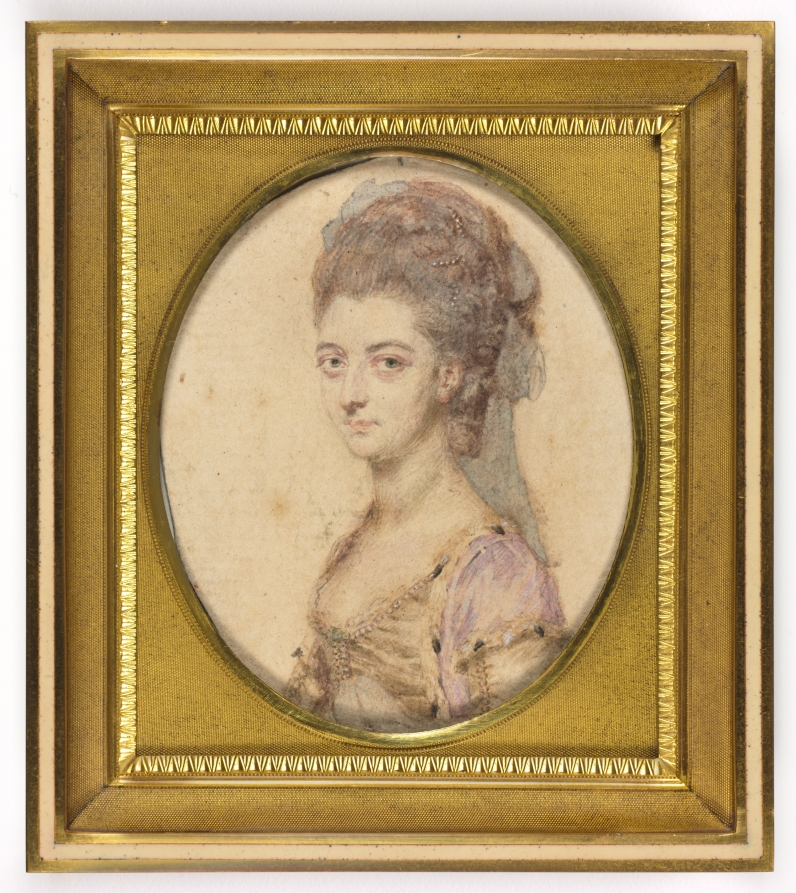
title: Portrait of Charlotte Bertie, née Warren, 4th Countess of Abingdon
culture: England, 18th century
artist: John I Smart (British, 1741–1811)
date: 1778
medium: graphite and wash on laid paper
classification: Portrait Miniature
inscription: inscribed on verso of paper to top in brown ink: [L]ady Abingto[n] 1778; inscribed at bottom of verso in graphite: J Smart / Lady Abington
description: Although it is impossible to say if it was always part of the artist’s process to execute a preparatory sketch prior to painting each miniature, we do know that John Smart retained many hundreds of these sketches. A group of preparatory sketches—of which this portrait is one—descended through the Smirke family after Smart’s daughter Sarah gave a sketchbook containing preparatory portrait studies to her friend Mary Smirke, sister of the celebrated Victorian architect Sydney Smirke. This book was probably broken up around 1877 when it was divided between Sydney’s daughters Mary Jemmett and Mrs. Lange, whose portions were both sold at auction in 1928. G. C. Williamson was the first to suggest that Smart’s sketches were well known and that they were preparatory studies for the painted miniatures. Williamson listed the names of sitters from the sketches known to him at the time, and they included Lady Abingdon. Here, Lady Abingdon’s head and shoulders face right. Her brown hair is dressed high on her head, and a strand of pearls is woven through the left side of her coiffure. A veil descends from the top of her head, past her shoulders. She has gray eyes. Compared to his contemporaries George Engleheart (1752–1829) and Andrew Plimer (1763–1837), whose female sitters were often painted in similar simple white gowns, Smart often lavished more attention on the costumes in his portraits of women, whose dresses incorporated colored silks, printed fabrics, and luxury trimmings like lace and fur. Thus, Lady Abingdon wears a low-necked, pink dress trimmed with ermine and strands of pearls. The background is unpainted. The removal of the paper backing revealed an inscription in brown ink, written in Smart’s hand, dating the work and verifying the identity of the sitter as Lady Abingdon. Lady Abingdon (d. 1799) was the daughter of Admiral Sir Peter Warren, K.B., M.P. She married Willoughby Bertie, 4th Earl of Abingdon, in 1768. They had six children, two of whom died very young. It is for Lady Abingdon that Abingdon Square in New York City is named, courtesy of her father, who had purchased 300 acres of land in Greenwich Village in 1744. Her husband’s famous protestations against the British government’s treatment of America during the War for Independence ensured that even in 1794, when the New York city council was rooting out British names from public streets and spaces, the name of Abingdon Square was retained. The family was painted by some of the great artists of the day, including Nathaniel Dance-Holland (1735–1811) and John Francis Rigaud (1742–1810). The formal portrait of 1769 by Dance-Holland, in which Lady Abingdon is depicted in coronation robes and holding her peeress’s coronet, conveys the pomp and tradition expected from a marriage portrait of a powerful peer. But even Smart’s miniature portrait sketch of almost a decade later maintains some of this grandeur, depicting the countess with aristocratic bearing and wearing the rich ermine-trimmed gown to which her station entitled her. A miniature on ivory corresponds to this preparatory sketch, although it is dated 1777, suggesting that the sketch may have been executed the following year in preparation for a second version of the portrait. There are slight differences in the details of the dress, particularly the left sleeve—which has been lengthened—and a slight reduction in pearl and ermine trim. The portrait on ivory also has somewhat more softness in the facial features, but many of the details, including the veil and the lock of hair on the right shoulder, are extremely similar. The miniature’s current location is unknown.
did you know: Sketches helped John Smart work out the particulars of a portrait before commencing the miniature on ivory, and they were useful in the event that a duplicate might later be required.